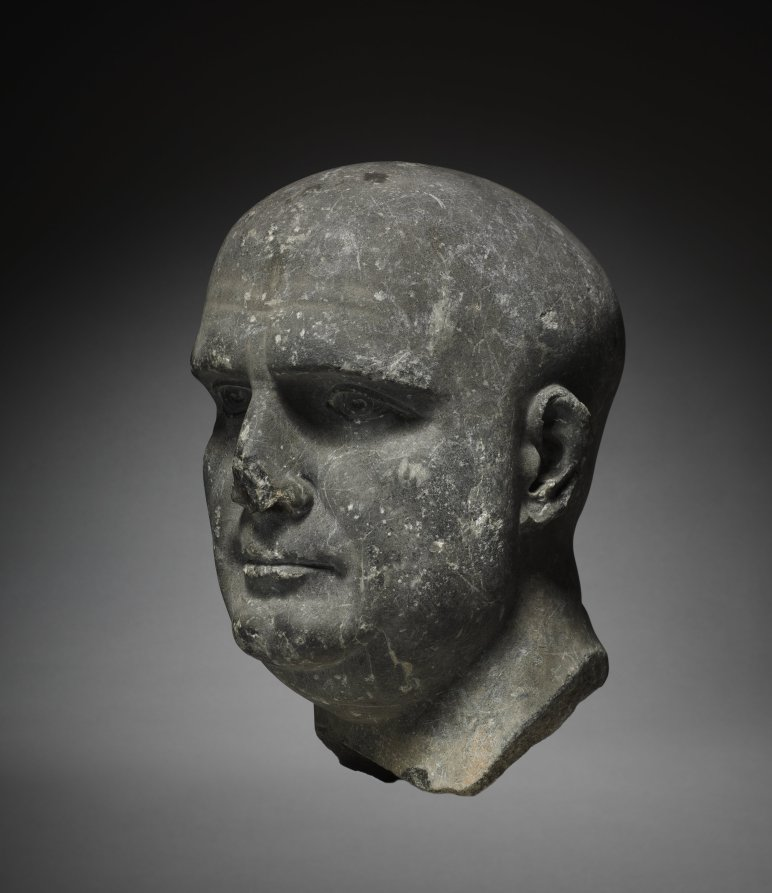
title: Portrait Head of a Priest of Isis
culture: Italy, Roman style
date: 100–200 CE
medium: limestone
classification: Forgery